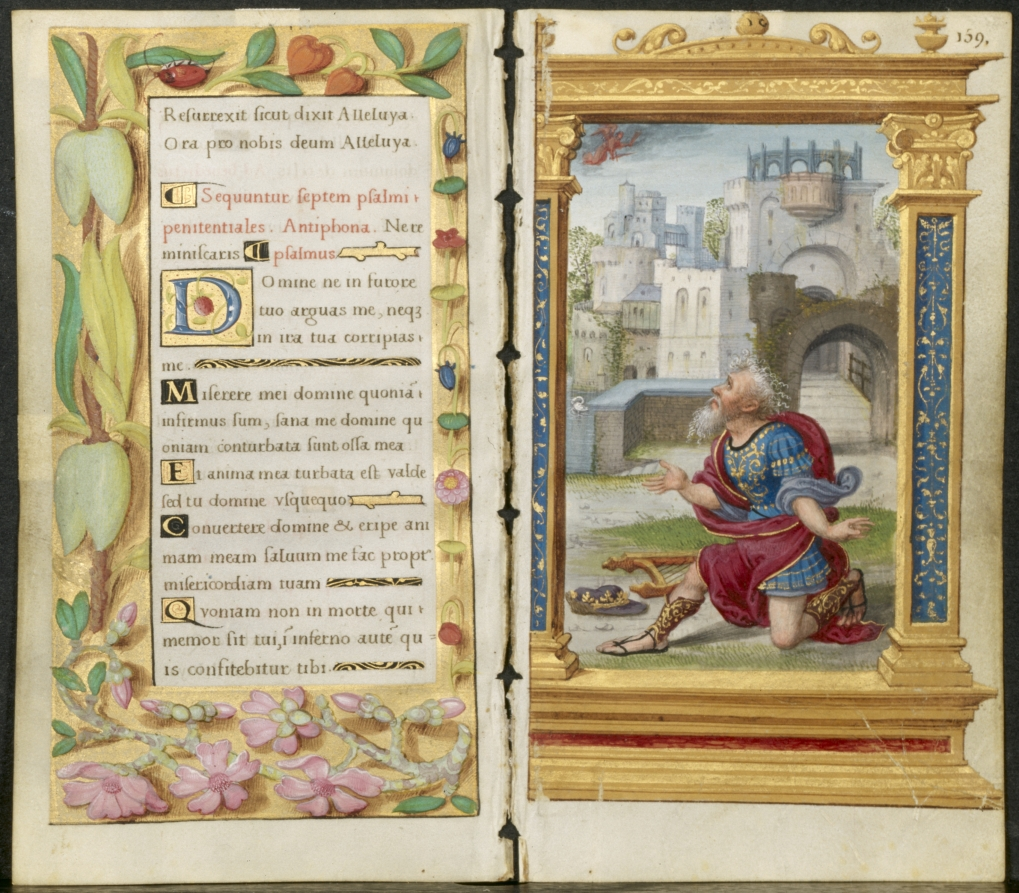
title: Leaf from a Book of Hours: King David in Prayer (2 of 3 Excised Leaves)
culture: France, 16th century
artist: Noël Bellemare (French, d. 1546)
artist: The 1520s Hours Workshop (French)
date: c. 1530–35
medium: ink, tempera and liquid gold on vellum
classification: Manuscript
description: The 1520s Hours Workshop produced luxury books of hours for a wealthy, often royal, clientele. Recent evidence points to Paris as the site of the workshop’s activity under the direction of Antwerp-born miniaturist Noël Bellemare (died 1546). Containing fuschia pinks and bright acid greens, the palette is unusual in French manuscript painting of the period. Instead, Bellemare’s miniatures point directly to Antwerp painting at the time.